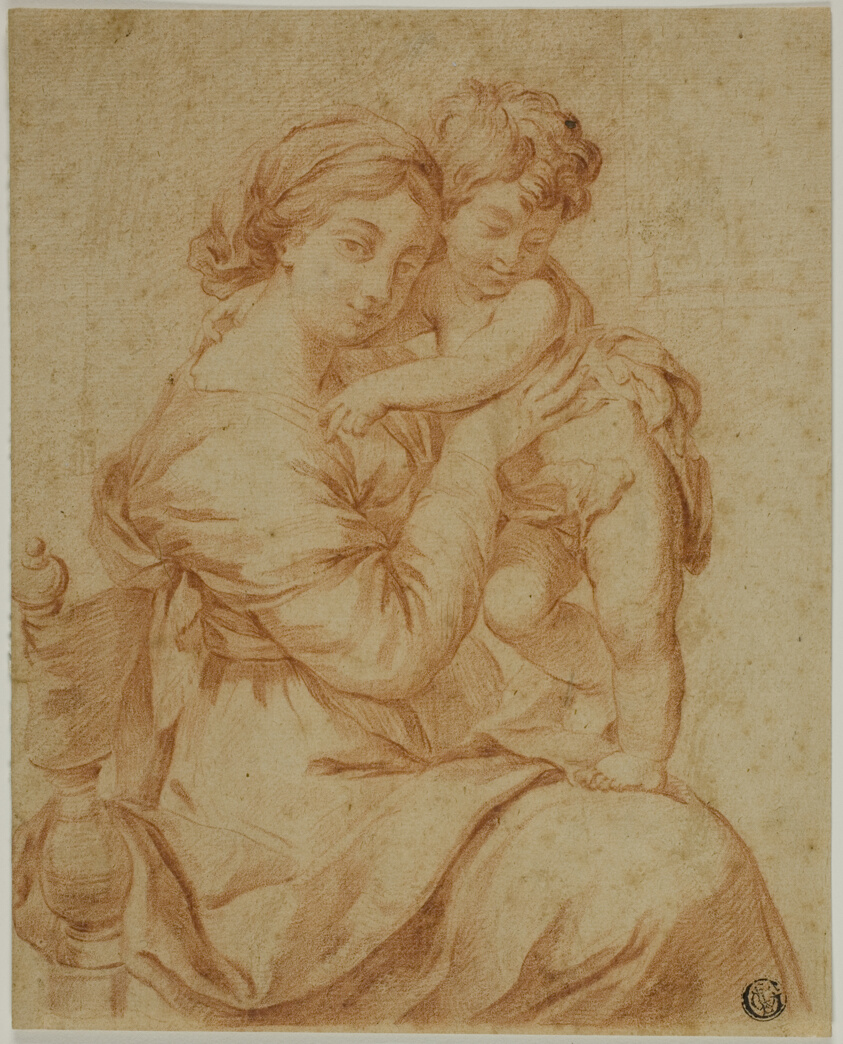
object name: Drawing and Watercolor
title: Madonna and Child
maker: After Pierre Mignard I; French, 1612-1695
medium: Red chalk on tan laid paper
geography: France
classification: chalk; drawings (visual works); prints and drawing